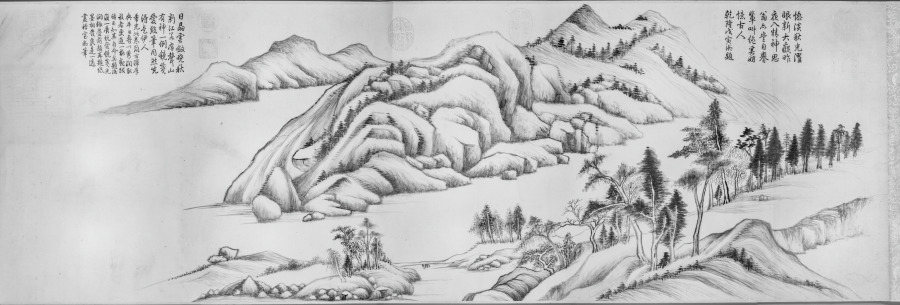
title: River and Mountains on a Clear Autumn Day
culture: China, Ming dynasty (1368–1644)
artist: Dong Qichang (Chinese, 1555–1636)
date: c. 1624–27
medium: Handscroll; ink on Korean paper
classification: Painting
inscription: 黃子久江山秋霽似此，當恨古人不見我也。思翁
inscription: 董文敏每遇高麗鏡面箋，書畫尤為入神。此卷改表紙用之，字跡隱然，兼有朝鮮之印。至於筆法圓秀，真接倪黃。豈文沈所可同日而語也。 康熙庚午中秋後一日，天氣澄爽，重裝初畢，跋於瓶廬。抱瓮翁高士奇。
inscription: Second inscription by Gao Shiqi 高士奇 (1645–1704): On the twenty-third day of the ninth month, the jiaxu year of the Kangxi era [1694], I packed my bags to head north. When my boat passed Wuchang [Suzhou], Mr. Mantang [Song Luo] brought wine to bid me farewell so that we could share our thoughts on our separation in the last few years. I showed him the paintings and calligraphy which I collected and asked his opinions. Since Mr. Mantang does not own any handscrolls by Wenmin [Dong Qichang], I leave this one for him in commemoration of our parting; thus the painting will have a worthy owner and our meeting will become a beautiful story in the future. It is the fourth day after the beginning of winter, with the sky clear and sober. Trees under frost have turned red and yellow, seemingly echoing the brush and ink in the painting. I also ask Mr. Mantang to inscribe a poem to commemorate our meeting so that it will survive forever.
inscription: 1 colophon and 4 seals of Song Luo 宋犖 (1634–1713): Who is the foremost art connoisseur of our dynasty?/ Tangcun [Liang Qingbiao, 1620–1691] is dead, so the title passes to Jiangcun [Gao Shiqi]./ Leaving office, you retired for five years in the Lake region./ Fondling handscrolls and hanging scrolls from morning to evening./ You sent me your collection catalogue Xiao Xia Lu last year;/ It is indeed the true equal of [Zhou Mi's] Yun Yan Guo Yan./ This year you returned to the capital by imperial order;/ Your boat with calligraphy and paintings anchored at the river bank in Suzhou./ When we met each other you did not waste any time for conversation by poured out immediately/ From your "coral net" extraordinary treasures./ You produced incomparable scrolls, with gold-inscribed labels and jade rollers,/ Pouring out from bags and trunks, they were spread in disarray./ Without a word, I rolled and unrolled until my fingers were numbed,/ We sat straight, facing each other quietly, and never felt tired./ For three days we forgot about sleeping and food./ And at times we shouted our joy out loud, forgetting who is host or guest./ Your Dwelling in the Fuchun Mountains and the Yuansheng manuscript/ These peerless works I myself examined with delight./ As an added pleasure to the farewell dinner under the Maple Bridge,/ You allowed me to hold again this handscroll by Dong Qichang--/ The Misty River and Piled Peaks [by Zhao Mengfu] and this Clear Autumn Day are two extraordinary masterpieces./ In showing such life and spirit with "qi yun." the artists were truly "men of heaven."/ The Clear Autumn Day is not even three feet long,/ Painted on tributary Korean paper, it shines like silver./ Every building up and every turn of the mountains imitates nature,/ Every tree and every rock is removed from the commonplace./ From the beginning, the theory of poetry is the theory of painting,/ Like the lotus and the morning sunshine, they complement and refresh each other./ The artist's inscription regrets that "the Old Masters cannot see my scroll."/ Huang Gongwang would have agreed in his grave./ The vermilion of the seals glitter and dazzles the eyes,/ These added accessories are as valuable as jade./ You are very kind to give it to me,/ The feelings expressed in your inscription are so sincere./ Wanting to refuse, but unable, I accept it to respect your wish,/ And taking off my gown and cap I wrapped it with care./ You asked me to write a long poem in commemoration of this beautiful occasion,/ I am too ashamed that my effort in response is so poor and inadequate./ Returning home, I unrolled it under candlelight, trying to write the colophon,/ The light of the waning moon shines at the foot of the mossy wall./ Earnestly humming and brows knit in deep thought, I try to compose;/ The verses are not outstanding, but the facts are real./ With this poem recorded at the end of the scroll, I mail it to you for approval,/ This poem and this painting shall outlast a thousand springs. (Translation by LYSL/HK/WKH)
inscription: 1 colophon and 2 seals of Shao Changheng 邵長蘅 (1637–1704); 2 inscriptions and 14 seals of the Qianlong 乾隆 emperor (r. 1736–95); 1 seal of the Jiaqing 嘉慶 emperor (r. 1796–1820); 3 seals of the Xuantong 宣統 emperor (r. 1908–11); 1 seal unidentified.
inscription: [印] 朝鮮國王之印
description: Dong Qichang had a tremendous impact on the artistic practices and historiography of later generations; his works and writings shaped literati aesthetics. Here, Dong places an abstract landscape composition diagonally across the picture plane, configured to recall earlier masters and simultaneously express his own personal style. Dong’s inscription claims, Huang Gongwang’s Autumn Day, looks like this. I truly regret the master has not seen my work. In fact, Dong Qichang may have had Dong Yuan’s Xiao and Xiang Rivers in mind, a work he owned and considered a key work in Chinese art history.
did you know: The painting has an imprint of a Korean seal that reads "Seal of the king of Joseon."